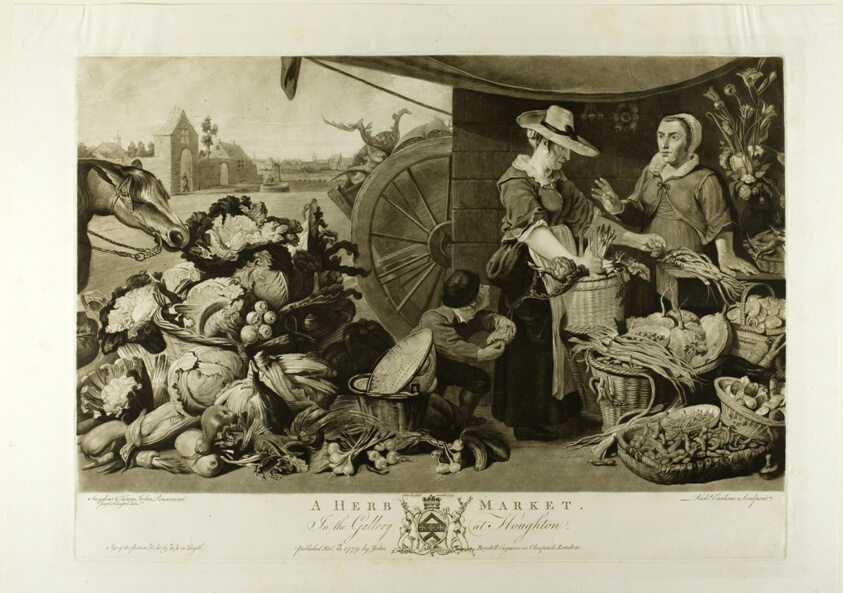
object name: Print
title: A Herb Market, from The Houghton Gallery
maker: Richard Earlom (English, 1743–1822); after Frans Snyders (Flemish, 1579–1657); intermediary drawing by Joseph Farington (English, 1747–1821); published by John Boydell (English, 1719–1804)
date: 1779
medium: Mezzotint, with etching and engraving, in brown-black on ivory wove paper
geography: England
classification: mezzotint; print; prints and drawing